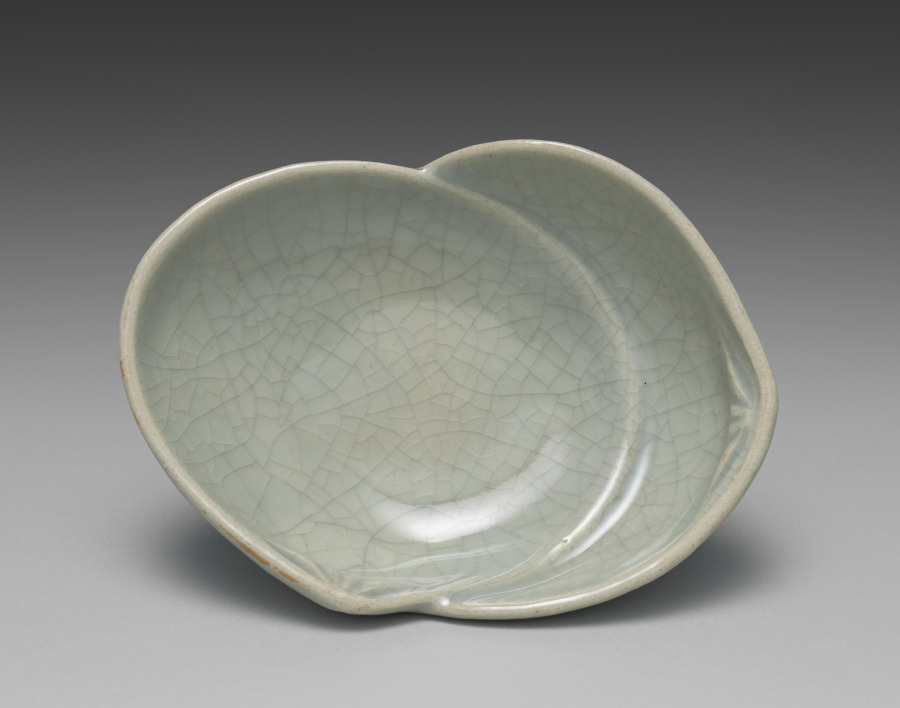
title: Dish from Dishes with Matching Shells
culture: Japan, Meiji period (1868–1912)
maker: Seifū Yohei III (Japanese, 1851–1914)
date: 1893–1914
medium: One of a pair of dishes; porcelain with celadon glaze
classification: Ceramic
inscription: 清風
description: Yohei III’s main output for his sophisticated clientele was in the form of tea sets and dining sets. He created a range of dishes in green glazes. He often produced in pairs, sets of five, or sets of ten. This pair of shell dishes have a box lid interior attestation by Yohei IV that the dishes were made by Yohei III with a cracked-ice (hyōretsu) pattern in the glaze, omitting reference to any glaze coloration.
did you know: These shell-shaped dishes are of the saucer type, suitable for dipping sauces.